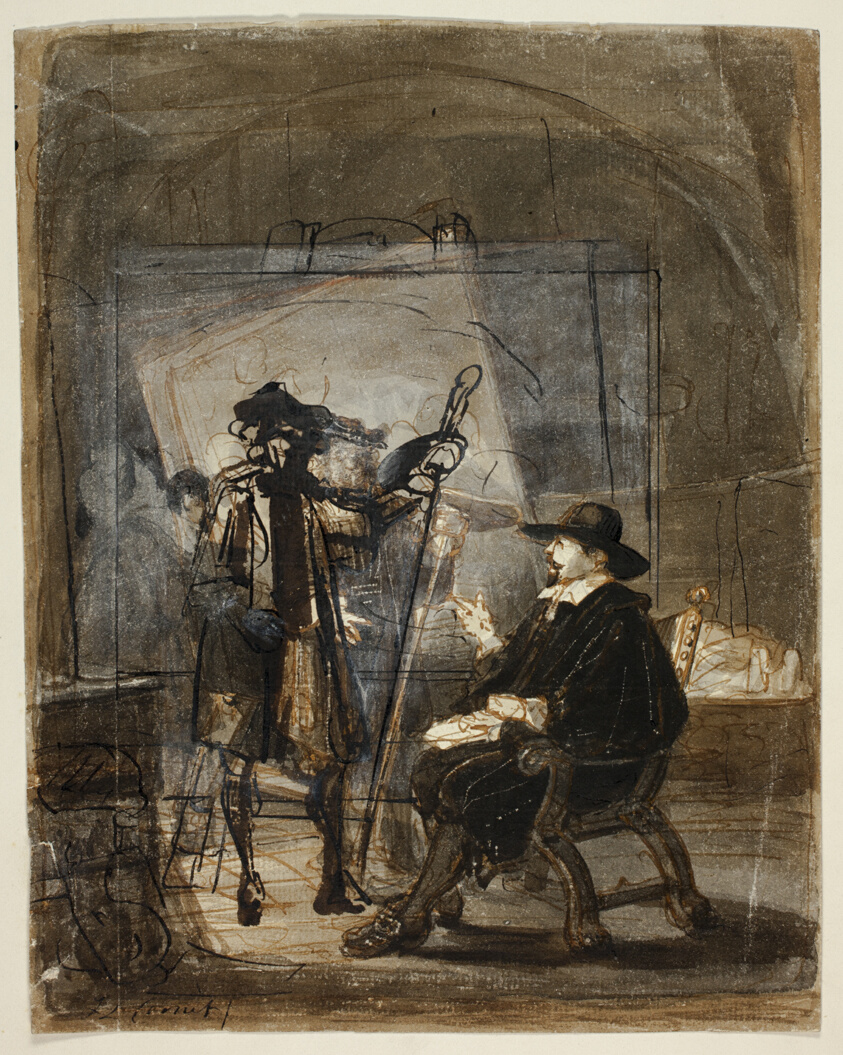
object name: Drawing and Watercolor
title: Dr. Nicholas Tulp in Rembrandt's Studio (recto); Scene from Rembrandt's Life (?) (verso)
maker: Jacob Ludovicus Cornet (Dutch, 1815-1882); after Rembrandt van Rijn (Dutch, 1606-1669)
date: 1846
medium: Pen and brown ink with brush and gray and brown wash and white gouache, over graphite, with scraping (recto), and pen and brown ink with brush and brown and gray wash, over red chalk and graphite (verso), on ivory laid paper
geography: Holland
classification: watercolor; drawings (visual works); prints and drawing